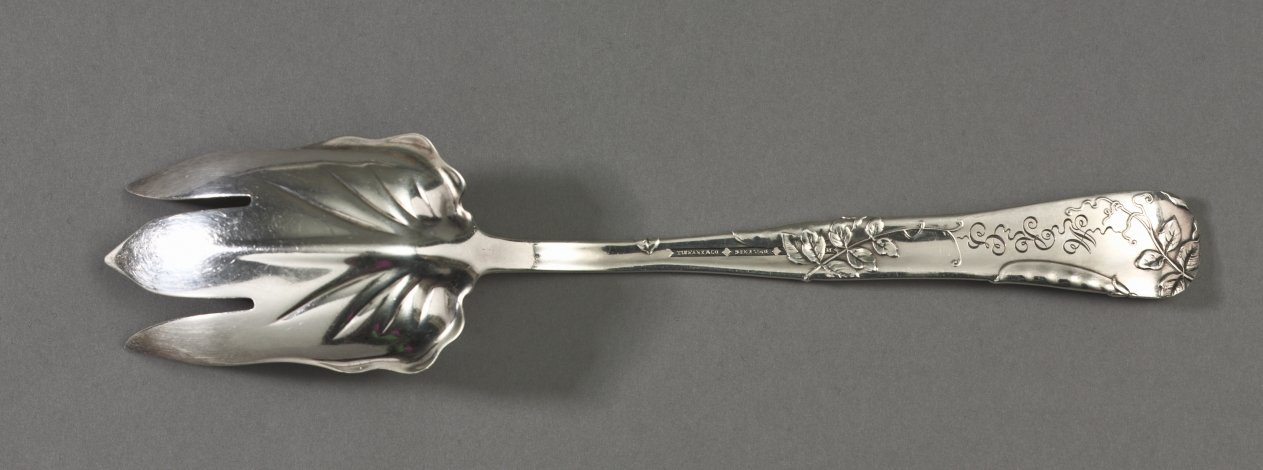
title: Vine Pattern Salad Fork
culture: America, New York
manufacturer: Tiffany & Co. (America, New York, est. 1837)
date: c. 1872–80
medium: silver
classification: Silver